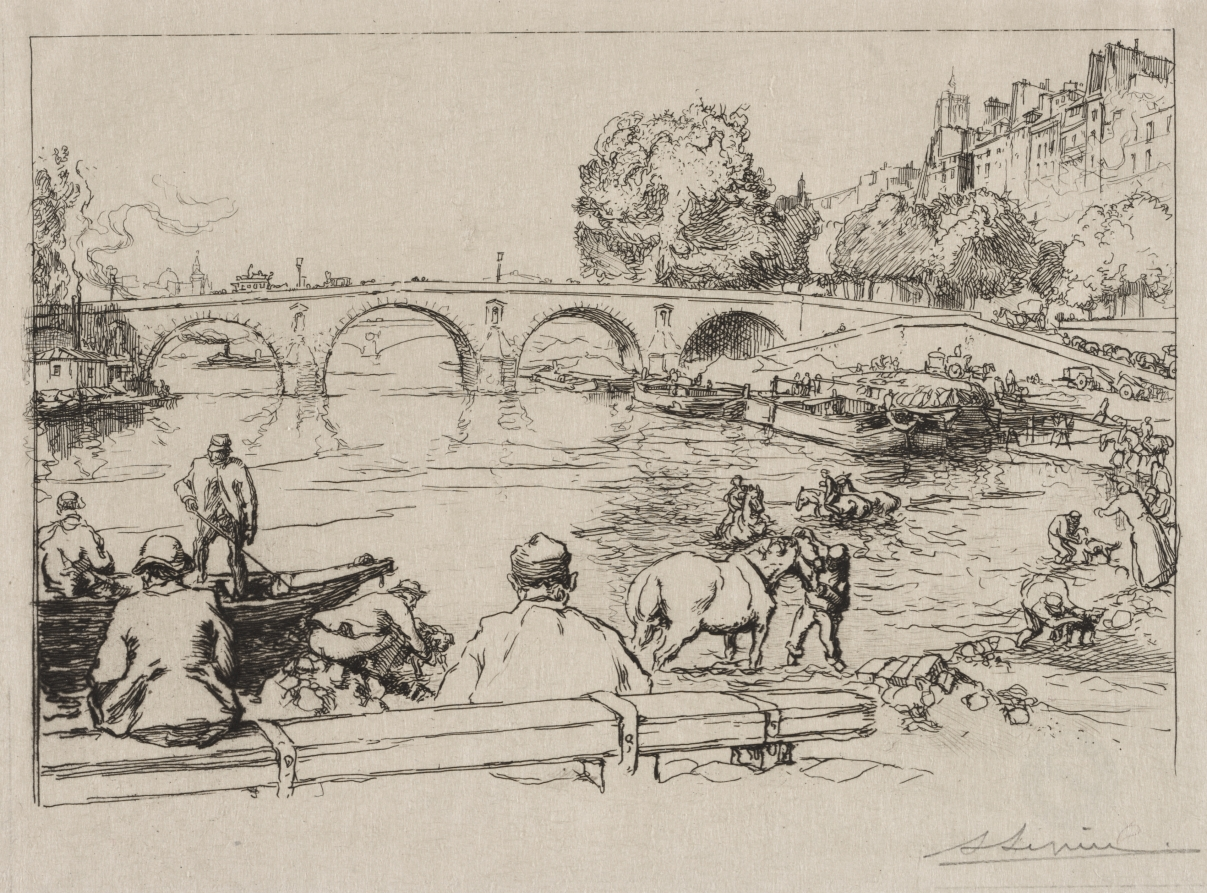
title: L'Abreuvoir at Pont Marie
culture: France, 20th century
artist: Auguste Louis Lepère (French, 1849–1918)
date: 1912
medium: etching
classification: Print